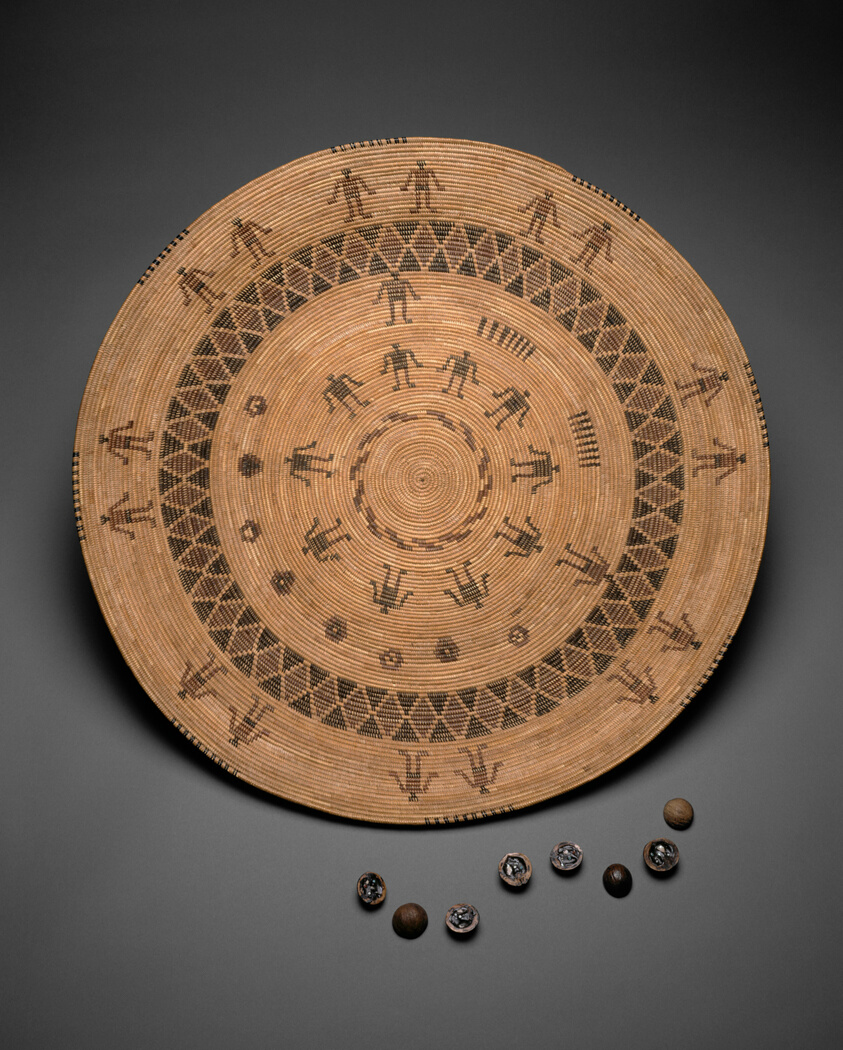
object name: Basketry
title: Gambling Tray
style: yokuts, native american, americas, california coast, native north american, Arts of the Americas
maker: Yokuts (Central California, United States)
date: c. 1900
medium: Plant fibers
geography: Central California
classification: basketry; art of the americas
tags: basketry, geometric, figures (representations), gambling, games